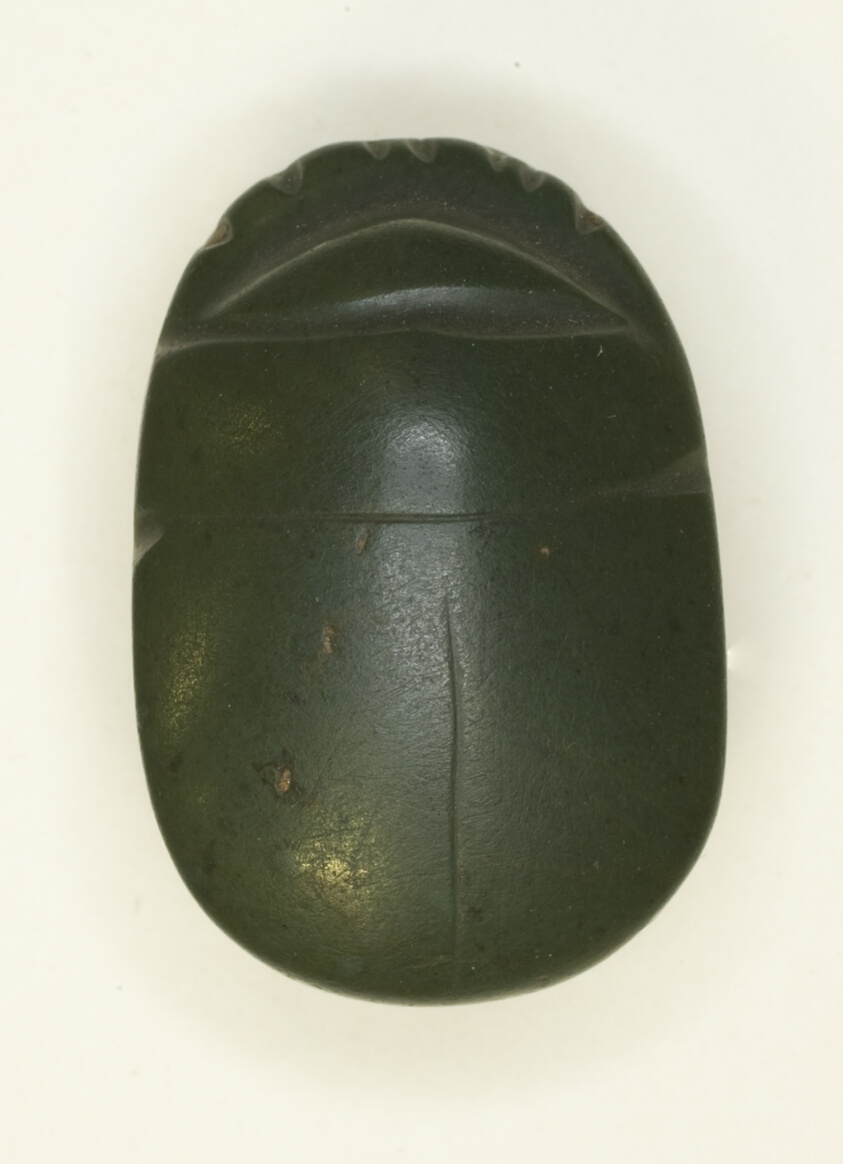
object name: Costume and Accessories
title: Scarab: Uninscribed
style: egyptian, middle kingdom, ancient, late period (egyptian), new kingdom, second intermediate period, third intermediate period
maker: Egyptian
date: Middle Kingdom–Late Period, Dynasties 12–26 (about 1985–525 BCE)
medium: Stone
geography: Egypt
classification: scarab; stone; ancient art; costume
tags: scarab beetle